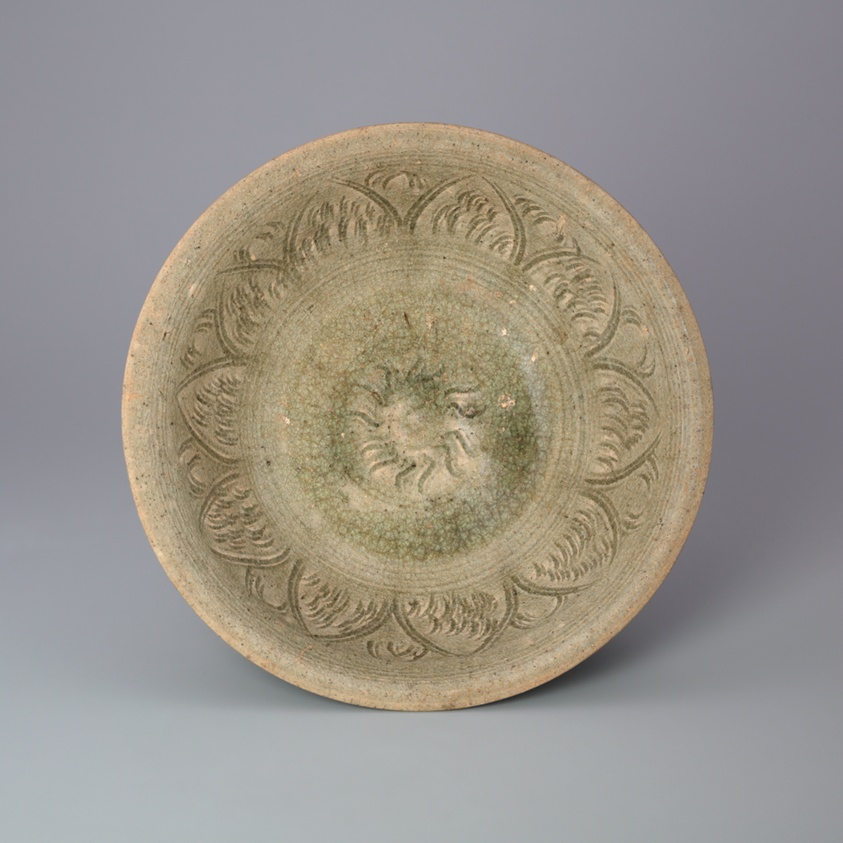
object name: Decorative Arts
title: Sawankhalok Ware Stem Bowl with Incised Lotus Petal Design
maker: Thailand; Sukhothai Province, Si Satchanalai, Sawankhalok Kilns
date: 15th century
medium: Stoneware with celadon glaze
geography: Thailand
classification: stoneware; decorative arts